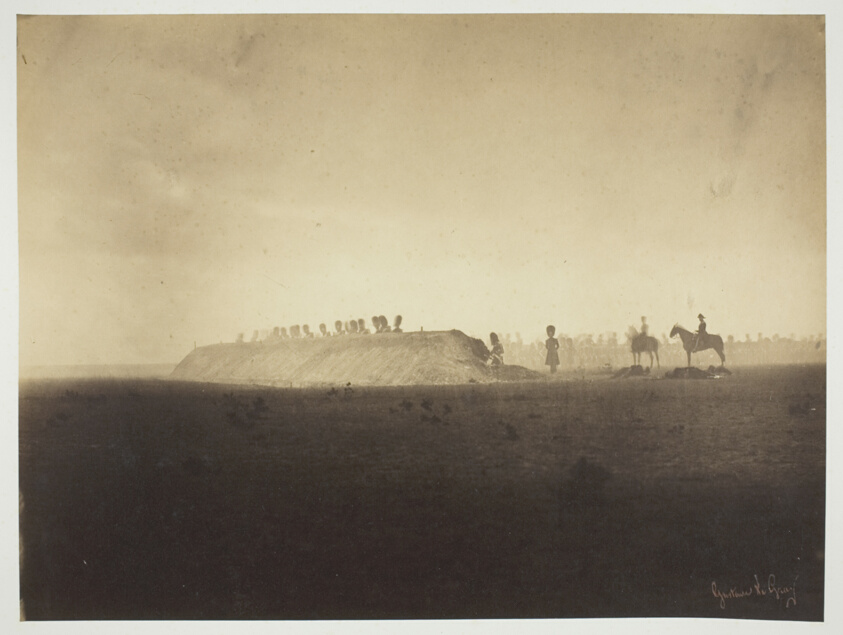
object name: Photograph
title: Chalons Encampment: Maneuvers on October 3 (Camp de Châlons: manoeuvres du 3 octobre)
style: 19th century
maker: Gustave Le Gray (French, 1820–1884)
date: 1857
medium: Albumen print, from the album "Souvenirs du Camp de Châlons"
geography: France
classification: albumen silver print; photographic process; photography; photograph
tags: Paris